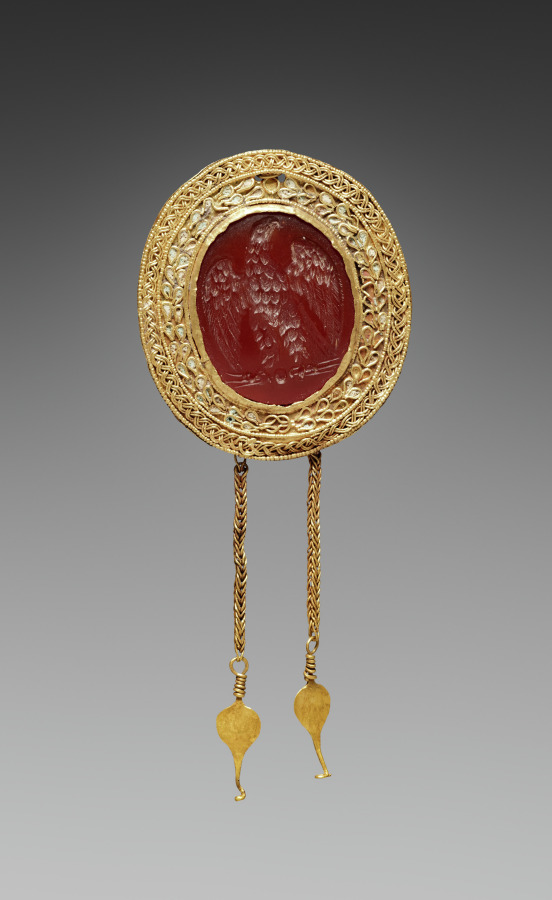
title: Intaglio: Imperial Eagle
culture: Italy, Rome, probably Augustan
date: c. 1–25 CE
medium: carnelian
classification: Jewelry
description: This intaglio, or engraved gem, depicts an eagle with wings partially spread, a lightning bolt clutched in its feet. The bird looks to the upper right, suggesting it may be about to take flight. This gem is expertly carved, with each individual feather of the eagle described with thin lines. The eagle was a symbol associated with the Roman imperial family, Roman military, and Jupiter, the supreme Roman deity. The setting is likely ancient, and it retains traces of enameling in some loops.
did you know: According to the Roman author Pliny, ancient carnelian was primarily sourced from India.